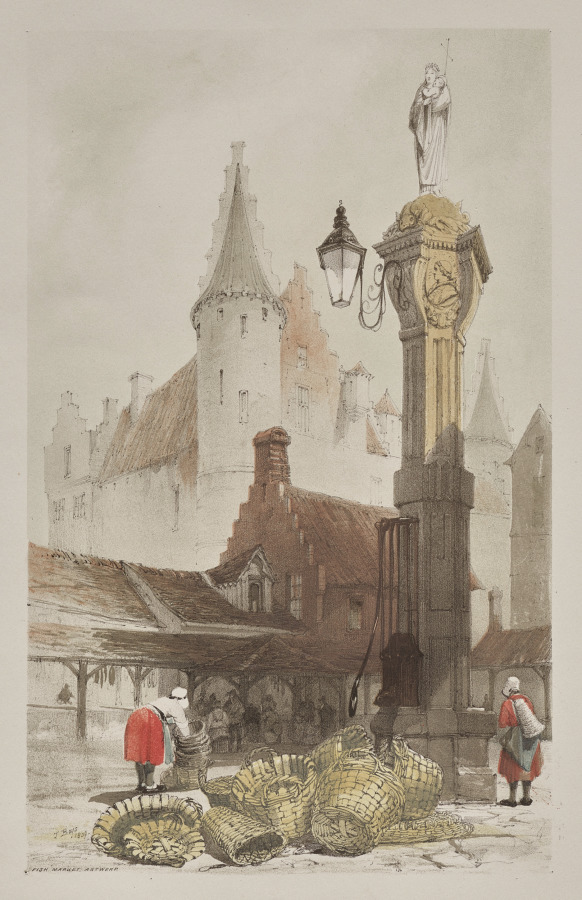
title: Picturesque Architecture in Paris, Ghent, Antwerp, Rouen: Fish Market, Antwerp, Belgium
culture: England, 19th century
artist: Thomas Shotter Boys (British, 1803–1874)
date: 1839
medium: lithograph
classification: Portfolio